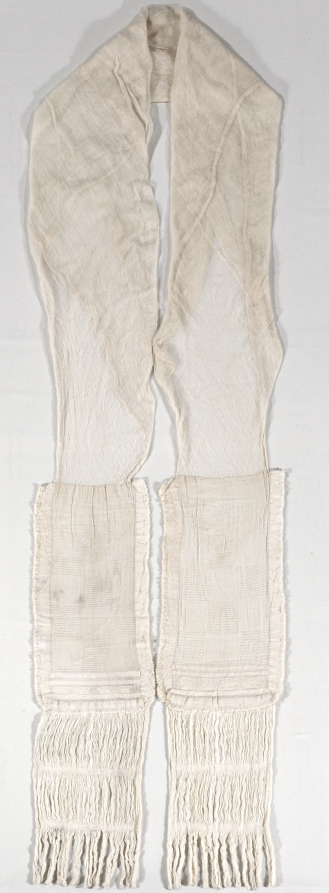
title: Turban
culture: Peru, North Coast, Chimú style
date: 1485–1640 (radiocarbon date, 95.4% probability)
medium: Cotton; plain weave, brocaded and complex alternating gauze with 5 shots of plain weave between gauze shots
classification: Garment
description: Chimú garments like this one consist of a large, rectangular central section—here measuring some 65 inches by 50 inches—with decorated tabs stitched to two opposite corners. Such garments probably were worn as turbans but we do not understand exactly how. For the purpose of display, the plain central section of this example has been folded to form a wide band, with the tabs arranged on either side.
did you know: The white cotton yarns used to make this textile are only 0.1 to 0.2 millimeters in diameter.